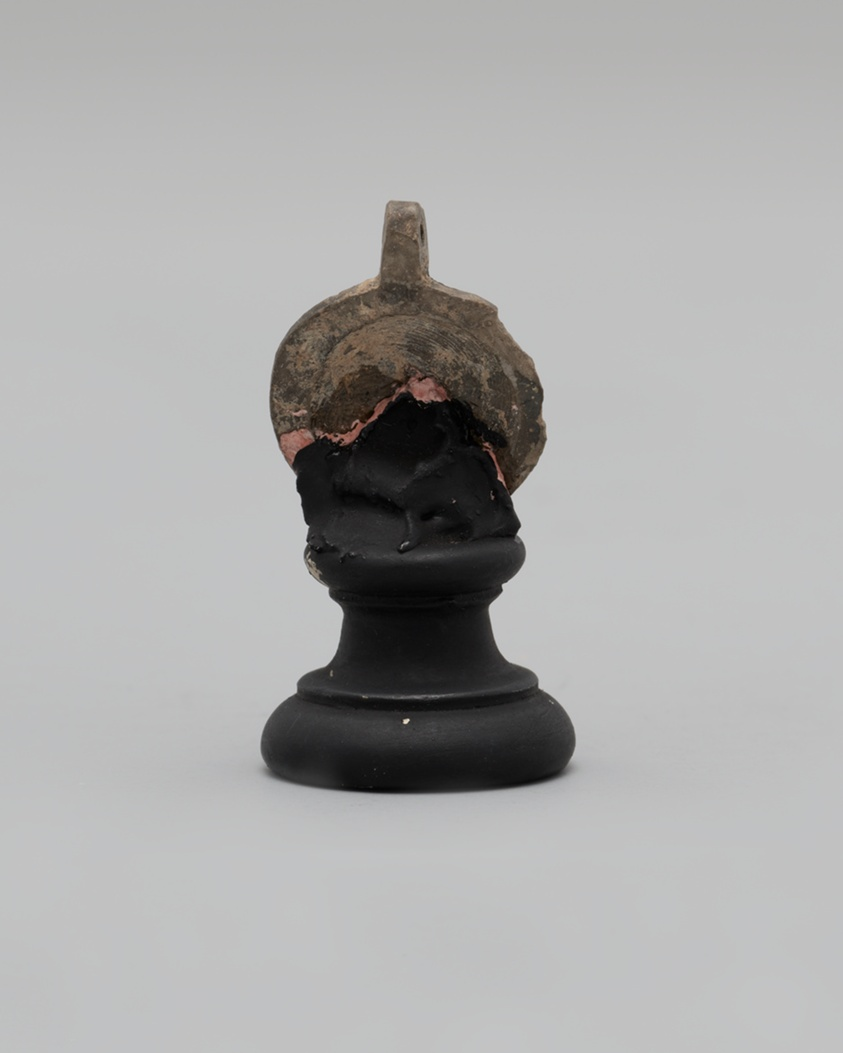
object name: Sculpture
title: Pendant Depicting Apollo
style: greek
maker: Greek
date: 2nd-1st century BCE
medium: terracotta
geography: Greece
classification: earthenware; ceramics; sculpture; ancient art